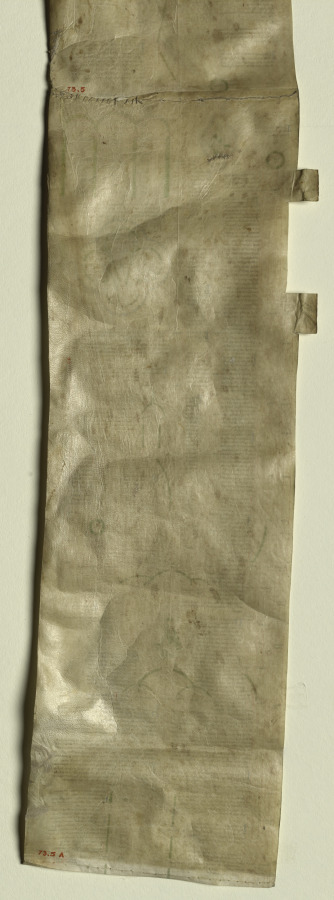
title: Peter of Poitiers's "Compendium Historiae in Genealogia Christi"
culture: England, Canterbury, 13th century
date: c. 1220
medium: ink and tempera on a vellum roll of four membranes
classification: Manuscript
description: This manuscript roll, composed of four membranes formerly stitched together in a continuous roll about nine feet long, has been divided in the middle for easier visibility and study. The text is an abridgment of biblical history focused on the descent of Christ from Adam. It was written by Peter of Poitiers (about 1130–1205), who taught theology and history in Paris and was widely copied. The present roll is an English copy of Peter's text made shortly after his death. Although manuscript rolls were hung on the walls of a classroom as instructional aids to students, some of them have value beyond their textual and historical interest because of the fine quality of their drawings, as seen here. A comparison with Canterbury manuscripts and stained glass of around 1220 is the basis for the attribution to Canterbury. Peter of Poitiers's aim in this project was to assist students prevented from mastering biblical history because of its length and because they were too poor to own books. His text on roll is the briefest possible summary of biblical history. It is arranged in six historical stages, denoting the six ages of the world, as decreed by theological tradition. The first five ages were inaugurated by Old Testament individuals: Adam, Noah, Abraham, David, and Sedecias. The birth of Christ heralded the sixth stage. Beginning at the top of the first membrane, the text consists of brief biographical entries on the ancestors of Christ (Adam, Noah, Abraham, Moses, and David) and other biblical personalities. These extend to the birth of Christ on the fourth membrane, ending with accounts of Hebrew and Roman kings and the Apostles. Each compendium shows the names of the ancestors inscribed within circles, those of direct descent placed vertically in a central column, others scattered in clusters to the right and left. The decoration of the roll consists of a series of medallions of diverse geometrical frames filled with either a figural drawing or a diagram. The style of these pen-and-ink drawings, some illuminated in tempera or tinted with wash, stems from English manuscript and glass painting attributed to the school of Canterbury Cathedral. The style of the museum's illustrations is so close to the stained glass panels made for Trinity Chapel at Canterbury (about 1220) to suggest that an artist active as a glazier in the Cathedral workshop may also have executed the manuscript. In the least, the painter of the roll manuscript was familiar with the style of the painted glass, and on this basis, a date of about 1220 seems appropriate. Additional evidence is supplied by a psalter illuminated at Canterbury shortly before 1220. The figurative scenes in this psalter were apparently illustrated by the same hand that executed the line and wash drawings in the museum's roll.